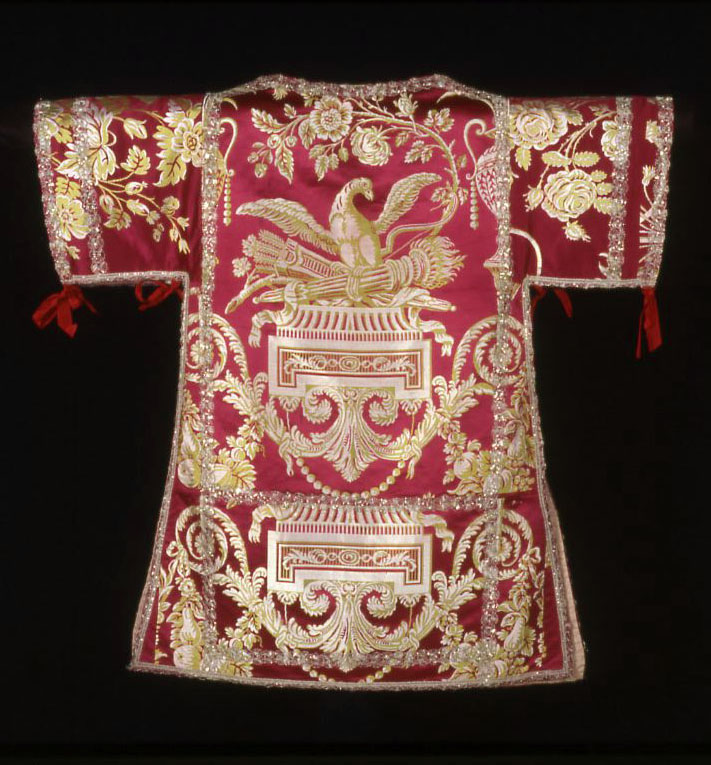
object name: Costume and Accessories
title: Dalmatic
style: directoire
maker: France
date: c. 1785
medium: Silk, warp-float faced 7:1 satin weave with weft-float faced 1:3 'S' twill interlacings of secondary binding warps and self-patterning ground wefts; braid and edge tape of silvered-metal strip and silvered-metal-strip-wrapped silk and cotton, bobbin straight lace; ribbons of silk, plain weave; lined with cotton, plain weave; glazed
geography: France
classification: textile; weaving; costume; lace - bobbin; liturgical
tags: garlands, flowers